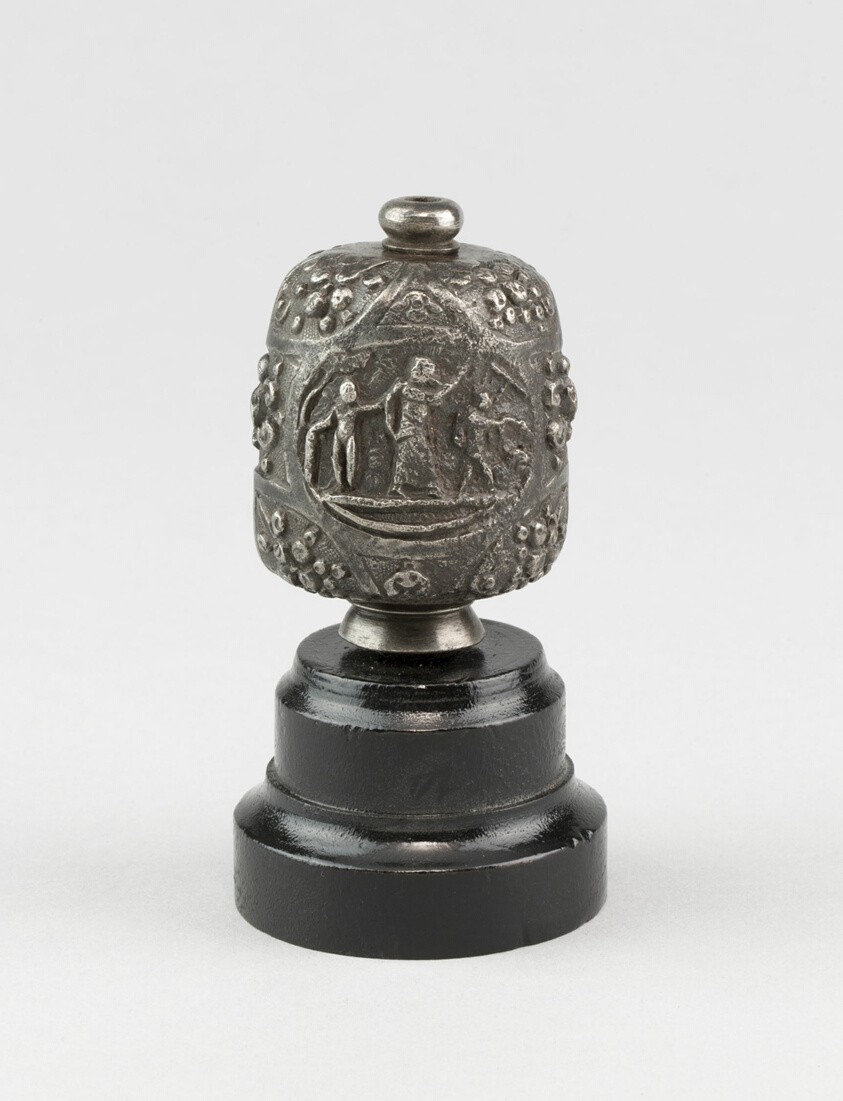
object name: Arms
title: Sword Pommel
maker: European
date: early 17th century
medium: Iron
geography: Europe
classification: edged weapon-sword; arms; arms and armor